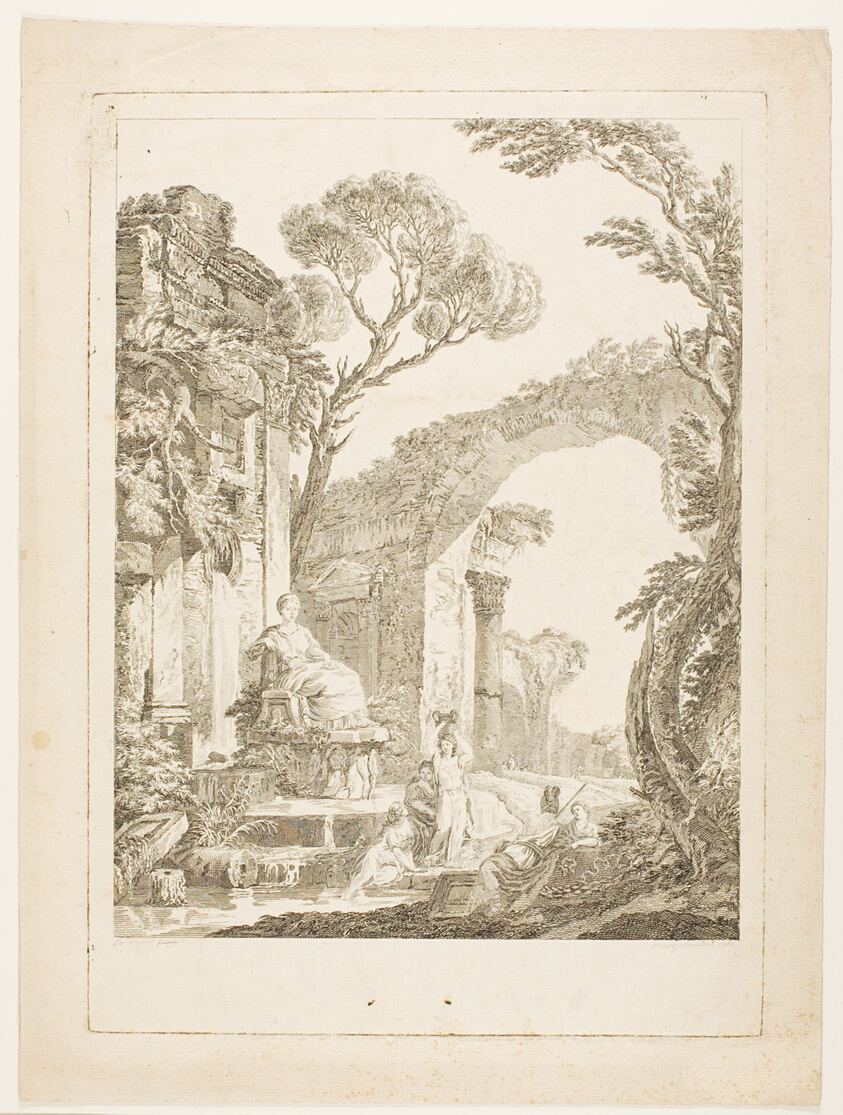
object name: Print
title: The Fountain in the Ruins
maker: Louis-Joseph Masquelier (French, 1744-1811); after Jean Baptiste Lallemand (French, 1710-1803)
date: 1765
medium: Etching on ivory laid paper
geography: France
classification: etching; print; prints and drawing